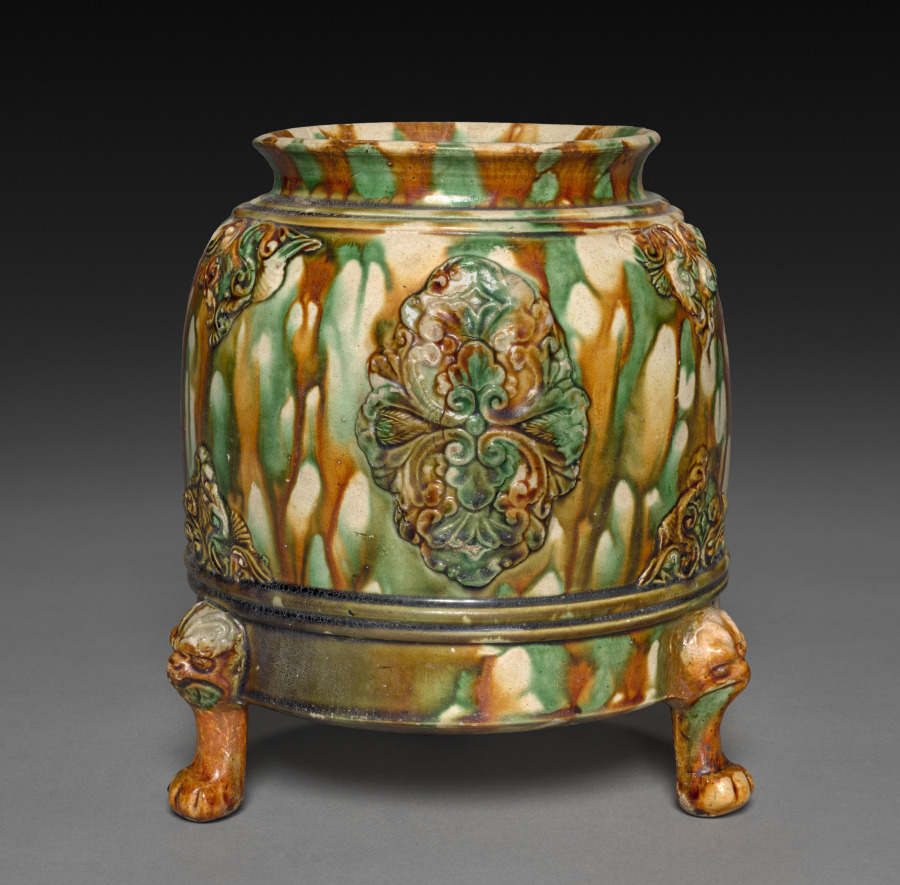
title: Jar with Applied Floral Decoration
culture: China, Tang dynasty (618-907)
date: 618–907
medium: Glazed earthenware, sancai (three-color ware)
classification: Ceramic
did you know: This sancai-glazed Tang vessel stands on three paw-shaped feet.